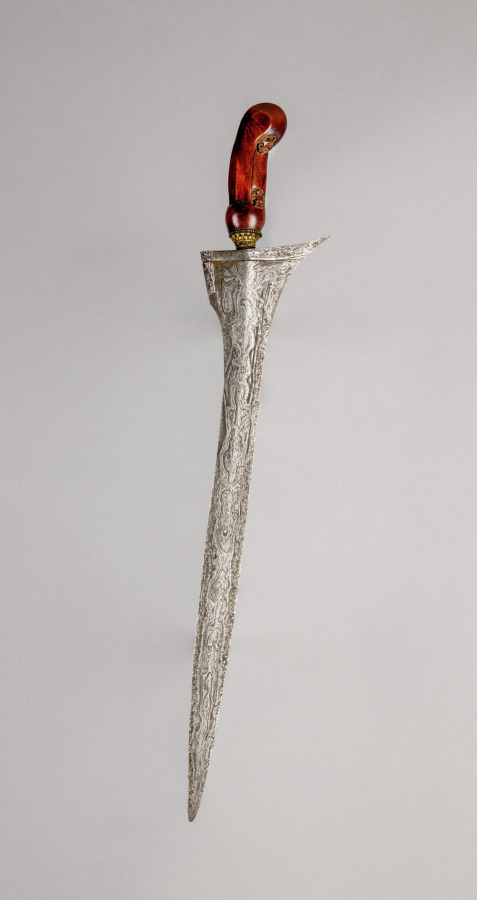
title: Sword (Kris)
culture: Java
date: 1800s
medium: iron with carved wooden handle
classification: Arms and Armor